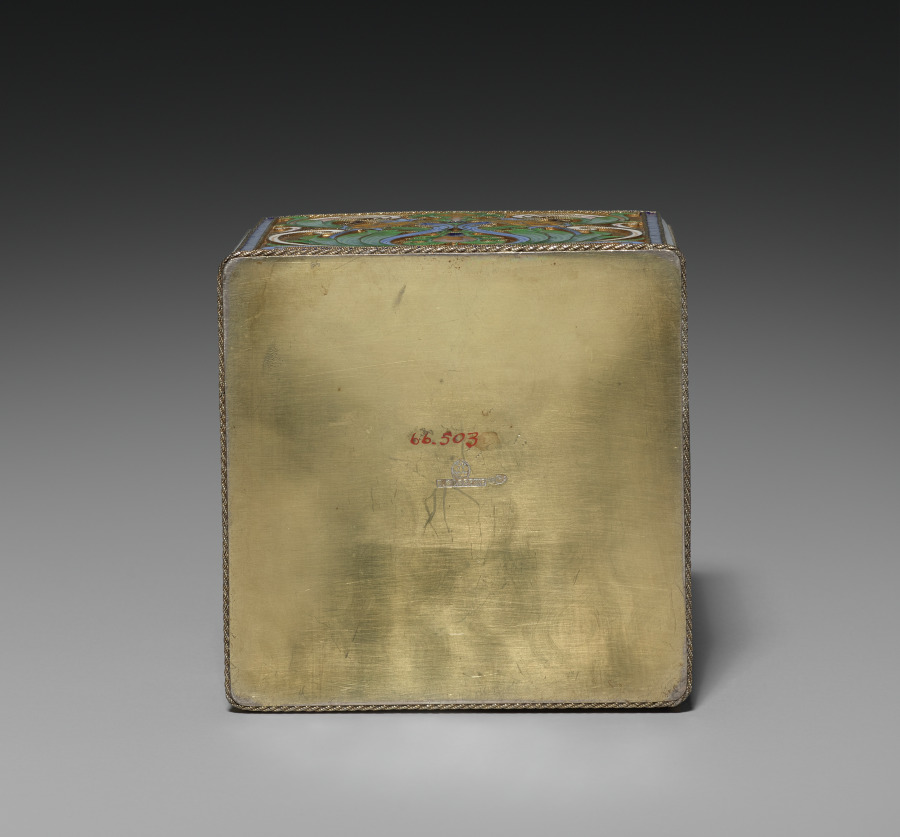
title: Tea Caddy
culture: Russia, St. Petersburg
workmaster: attributed to Feodor Ivanovich Rückert (Russian, 1840–1917)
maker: House of Fabergé (Russian, 1842–1918)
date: 1896–1906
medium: silver gilt, opaque cloisonné enamel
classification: Miscellaneous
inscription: 88, Kokoshnik, tester's initials [assay mark for Moscow, 1899-1908]; C. Fabergé (in Cyrillic); double-headed eagle [imperial warrant]; 88.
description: Fabergé’s craftsmen in Moscow, especially under the watchful eye of workmaster Feodor Rückert, became known for their work in the pan-Slavic or neo-Russian style, hearkening back to 17th-century motifs of Russian folk art. Often on rather conventional shapes, Rückert and his silversmiths created an explosion of color, achieved through the historic technique of cloisonné enamel in which tiny metal lines are soldered to the surface then filled with glass powders in various colors and fired to create a high gloss finish. The result is a spectacular evocation of the 17th-century originals. Far from mere copies, however, Rückert's designs, such as this tea service, employ naturalistic or abstract motifs in a thoroughly modern adaptation of a remarkable earlier period of Russian art and decoration.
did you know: This tea caddy is part of a larger tea service.